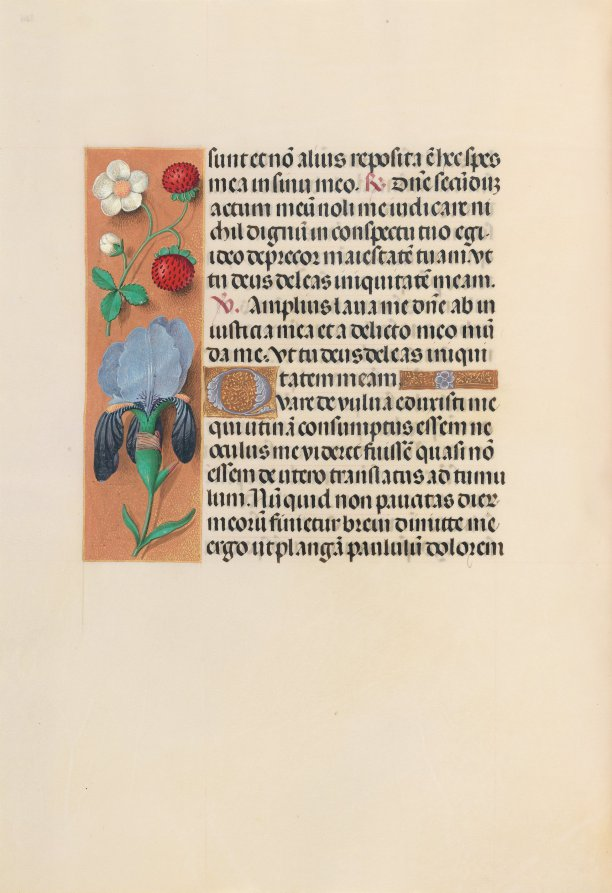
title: Hours of Queen Isabella the Catholic, Queen of Spain: Fol. 245v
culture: Flanders, Ghent and Bruges, late 15th century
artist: Master of the First Prayerbook of Maximillian (Flemish, c. 1444–1519)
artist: and Associates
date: c. 1500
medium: ink, tempera, and gold on vellum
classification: Bound Volume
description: This manuscript was illuminated by a circle of at least five highly organized manuscript painters active in the Flemish cities of Ghent and Bruges. The principal illuminator was Alexander Bening, who painted the majority of the book's miniatures. Manuscripts produced by this circle of artists are renowned for the decoration of their borders, which typically feature a rich variety of realistically-painted flowers, birds, and butterflies. This prayer book, called a book of hours, was intended not for a cleric, but for the private devotions of a lay person-in this case, Isabella the Catholic, Queen of Spain (1451-1504). Isabella's coat of arms embellishes the book's frontispiece. It is unlikely that the book was commissioned by the Queen herself; rather, she probably received it as a diplomatic gift from someone courting her patronage, perhaps Cardinal Francisco Jimenez de Cisneros. A Franciscan friar, Jimenez was dependent upon Isabella for his advancement, first to the post of Queen's confessor in 1492, and then to Archbishop of Toledo in 1495.